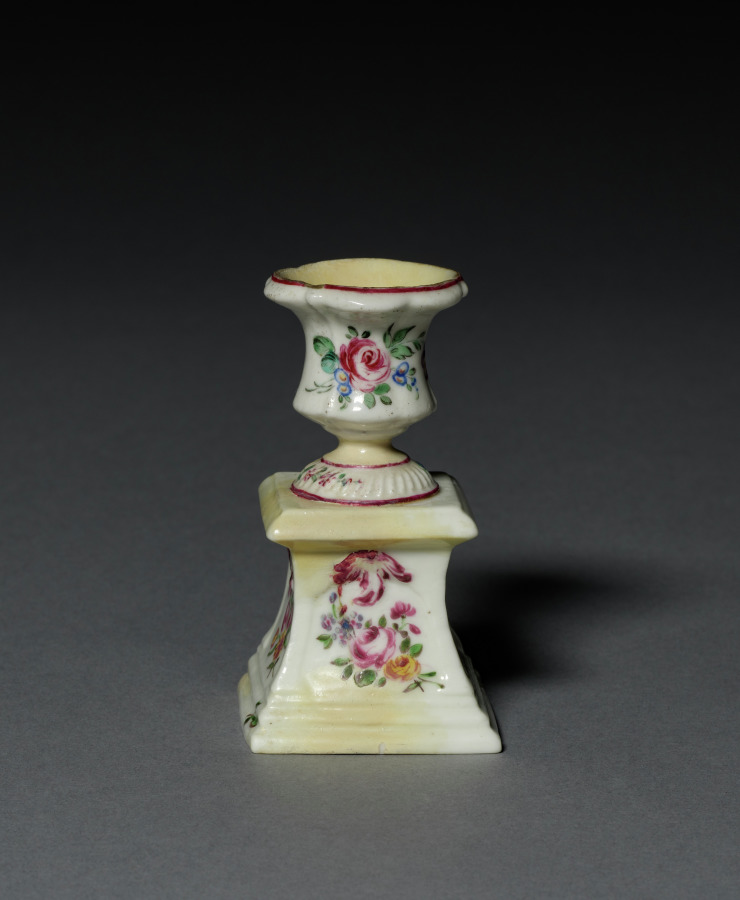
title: Medici Vase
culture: France, Mennecy, 18th century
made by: Mennecy Factory (French)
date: c. 1760–1765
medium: soft-paste porcelain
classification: Ceramic